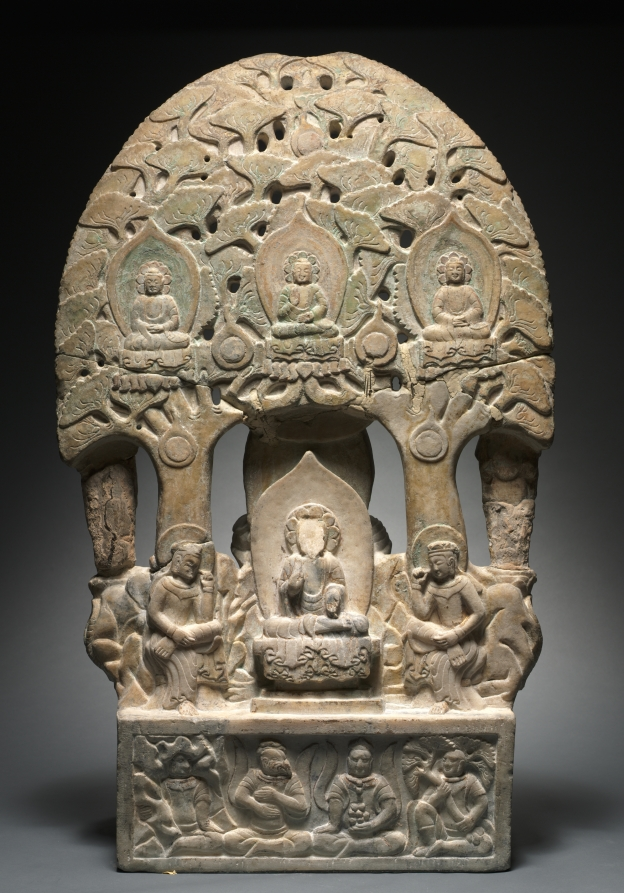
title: Stele: Maitreya as the Future Buddha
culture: China, Hebei, Six Dynasties period (317-581), Northern Qi dynasty (550-577)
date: 300s–500s CE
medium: marble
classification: Sculpture